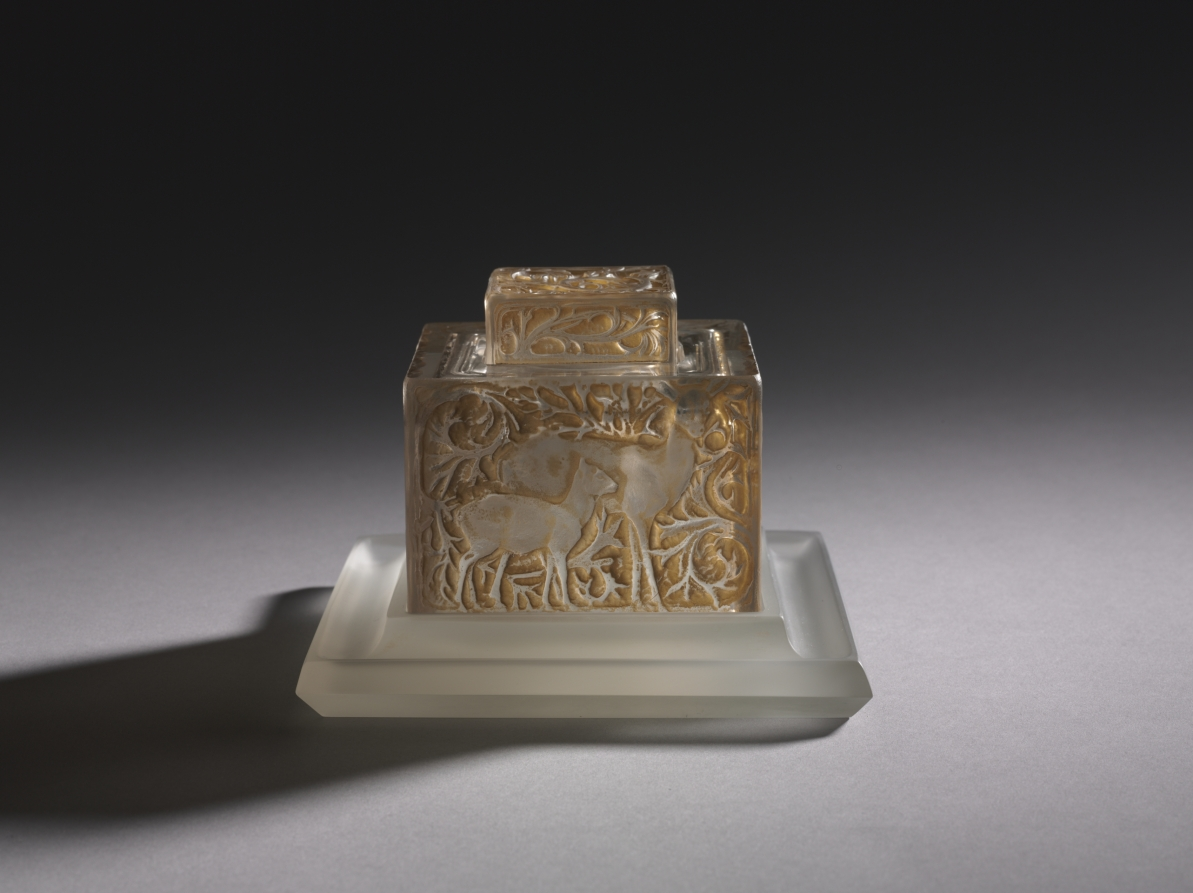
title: Deer Inkwell (Encrier biches)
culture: France, 20th century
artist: René Lalique (French, 1860–1945)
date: c. 1913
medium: clear glass with brown patina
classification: Glass